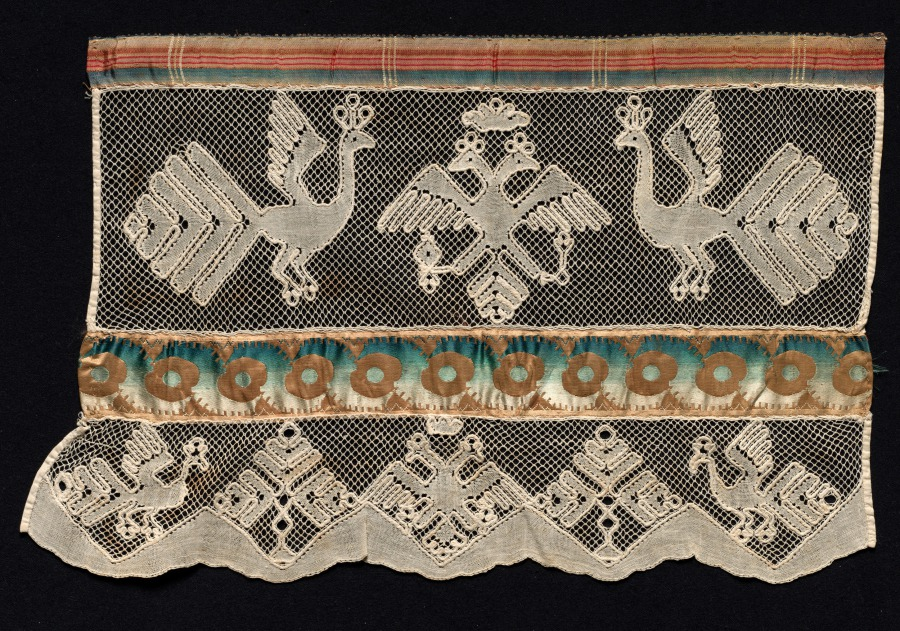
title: Lace Towel End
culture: Russia, Orel region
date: c. 1700s–1800s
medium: cotton or linen (est.) straight (continuous) bobbin lace; ground with interspersed motifs of plant and animal forms in plain weave outlined with gimp (heavy cord); applied silk (est.) ribbon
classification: Lace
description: This Russian lace panel was likely used to embellish the end of a bathing towel. Textiles of this type are valuable for their fine lace work including ancient folk motifs, ritual significance, exemplification of the role of textiles in their society, and in this case, connection to a prominent woman collector, Natalia de Shabelsky, without whom this textile and others like it might have been lost.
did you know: Embellishing the ends of everyday towels was a common folk tradition in many cultures because it displayed the skill of the mother or daughter who created them.